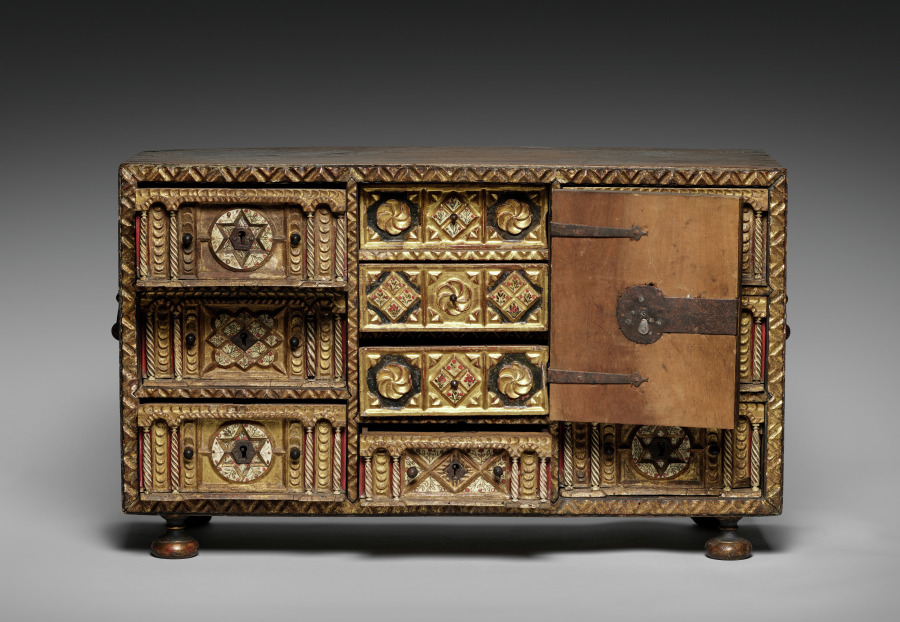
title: Chest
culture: Spain, Colonial, late 17th Century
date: late 1600s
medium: turned and joined wood, gilded and painted red with applied bone columns and bone inlays, wrought iron hardward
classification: Furniture and woodwork